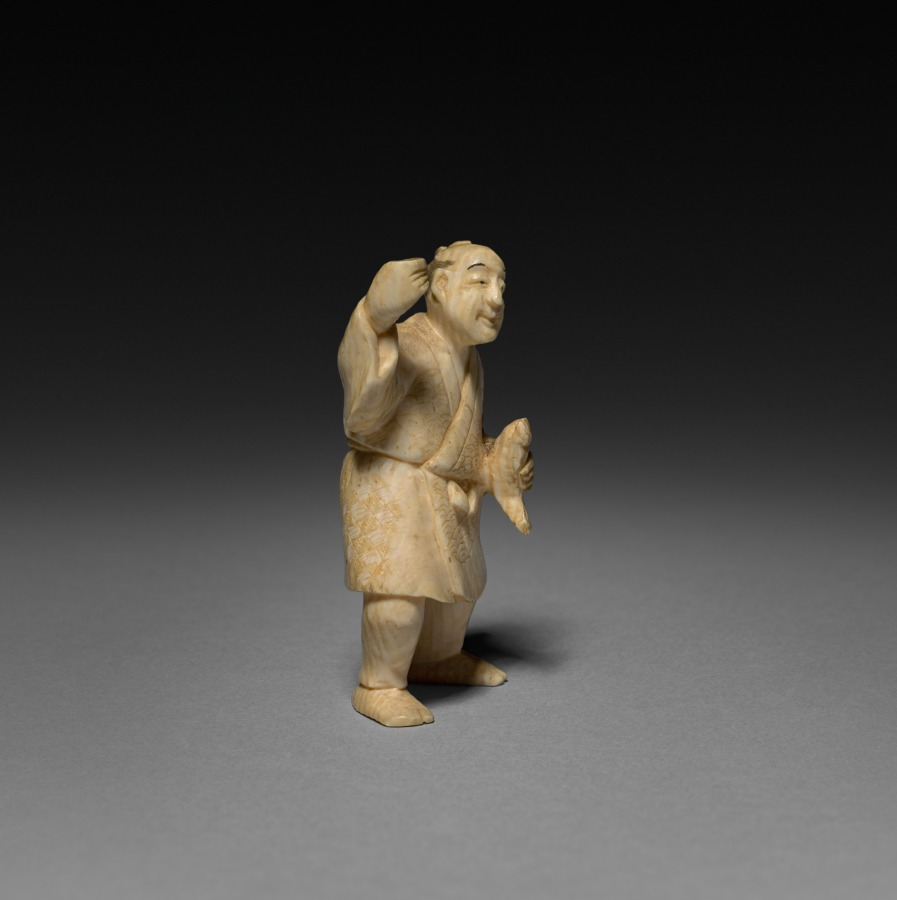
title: Man with Fish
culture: Japan, Meiji period (1868–1912)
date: early 1900s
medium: ivory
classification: Ivory